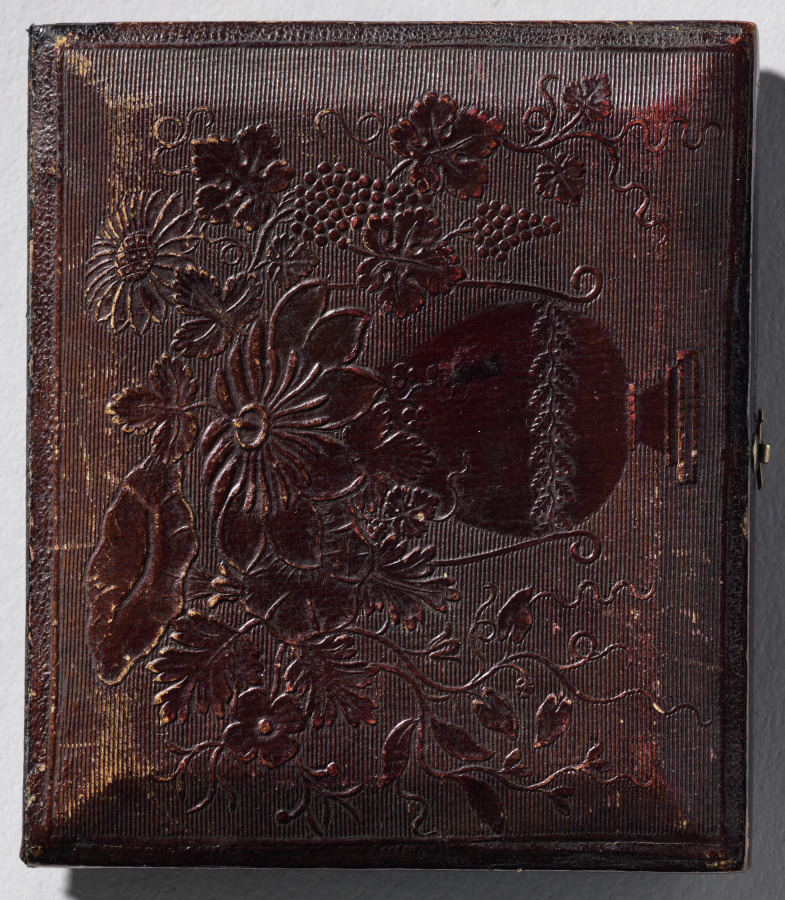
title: Girl with Doll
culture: America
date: 1850s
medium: daguerreotype, sixth plate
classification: Photograph